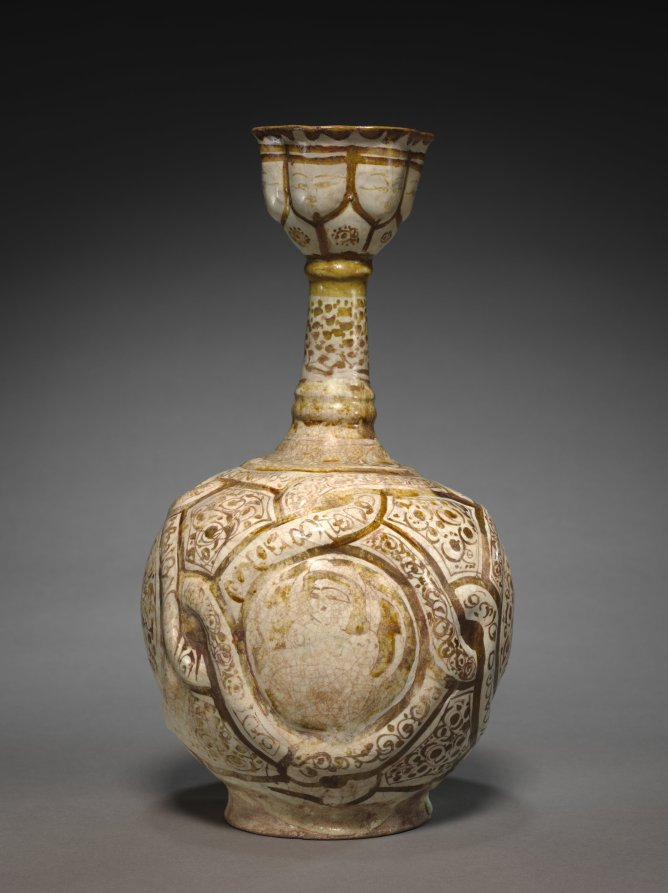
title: Jug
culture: Iran, Rayy, Seljuk period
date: late 1100s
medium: fritware with luster-painted design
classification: Ceramic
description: Fritware Where fine clay was unavailable, potters made a paste out of ground quartz, clay, and glass. When fired, the paste created a compact white material called fritware that approximated the appearance of porcelain.